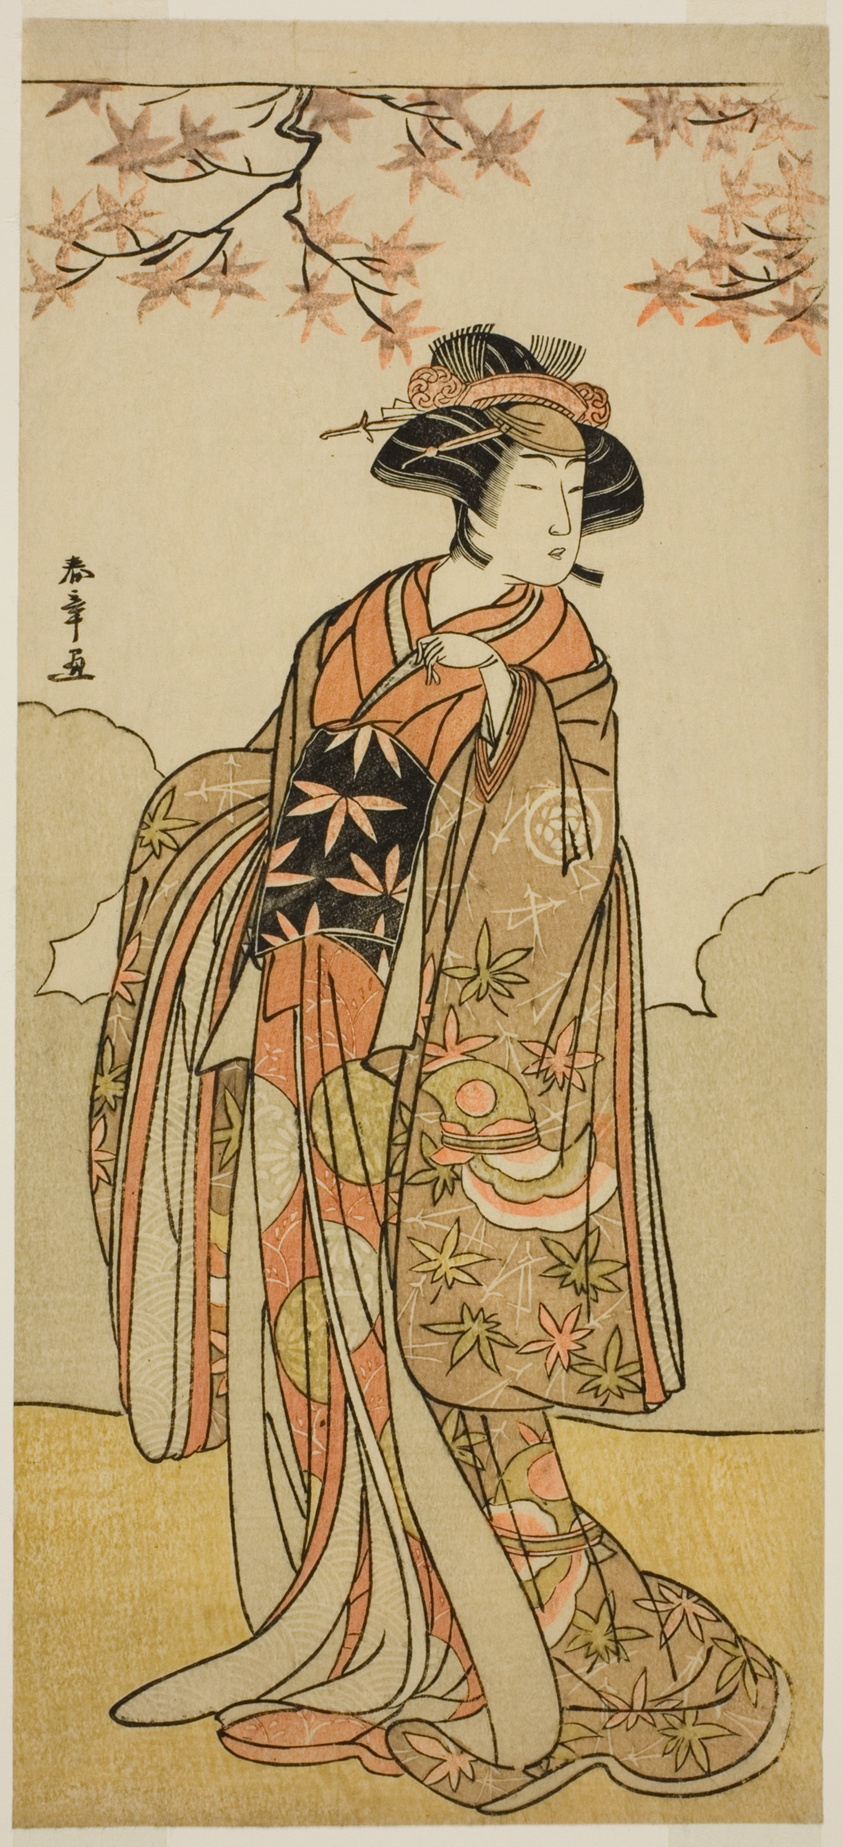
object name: Print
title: The Actor Osagawa Tsuneyo II as Onoe no Mae in the Play Date Nishiki Tsui no Yumitori, Performed at the Morita Theater in the Eleventh Month, 1778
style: Japanese (culture or style)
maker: Katsukawa Shunsho 勝川 春章; Japanese, 1726-1792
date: c. 1778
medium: Color woodblock print; hosoban; from a multisheet composition (?)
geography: Japan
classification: woodblock print; print; asian art